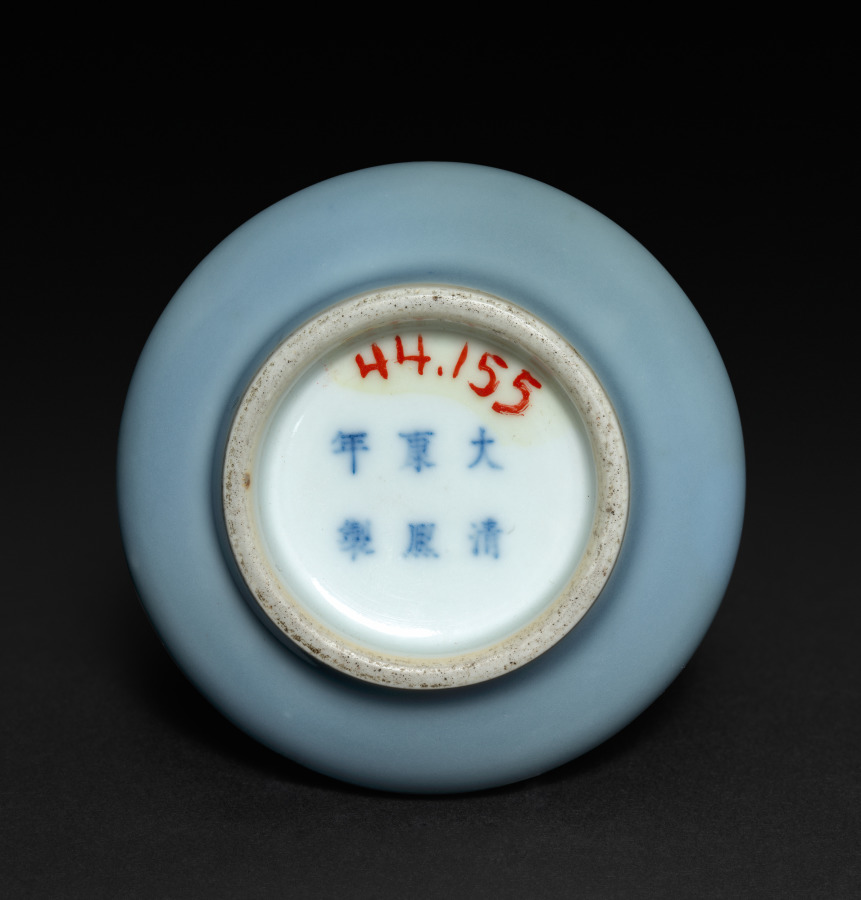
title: Bottle-Shaped Vase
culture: China, Qing dynasty (1644-1911), Kangxi reign (1661-1722)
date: 1661–1722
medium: porcelain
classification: Ceramic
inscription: 大清康熙年製